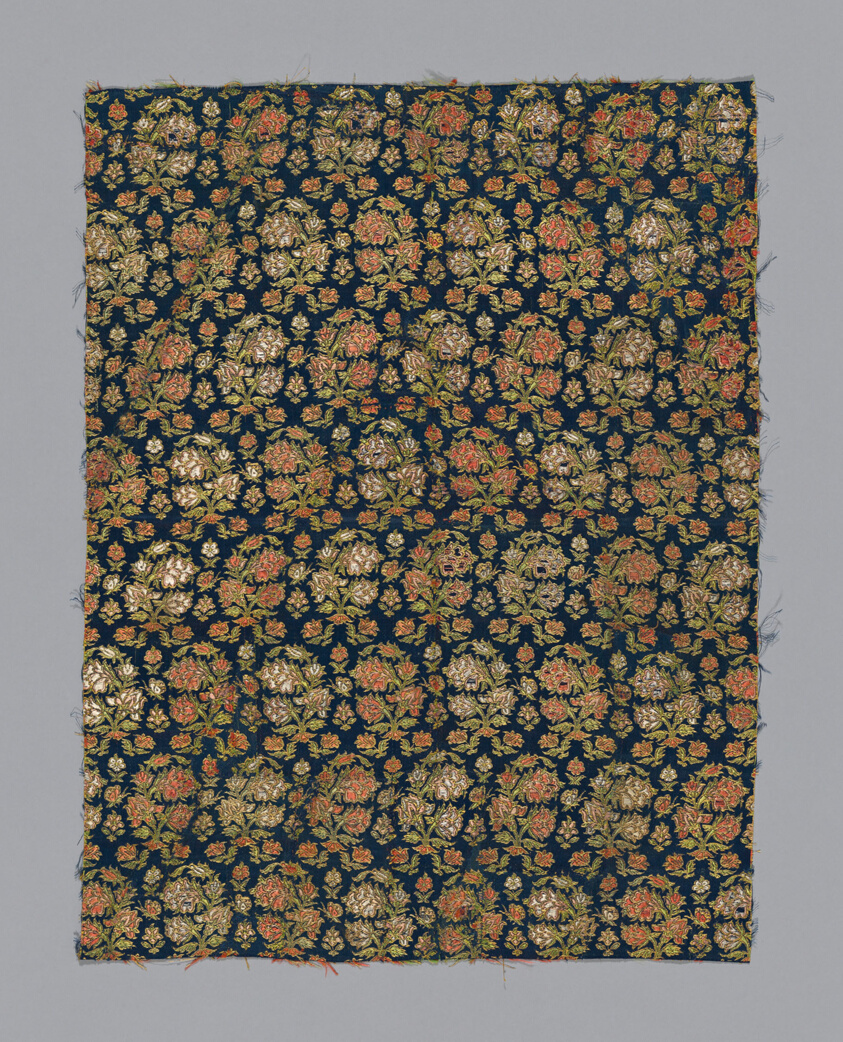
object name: Textile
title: Fragment (Dress Fabric)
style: kashan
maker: Iran (Persia, Kashan)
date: 18th century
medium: all-over rose design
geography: Iran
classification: textile; weaving